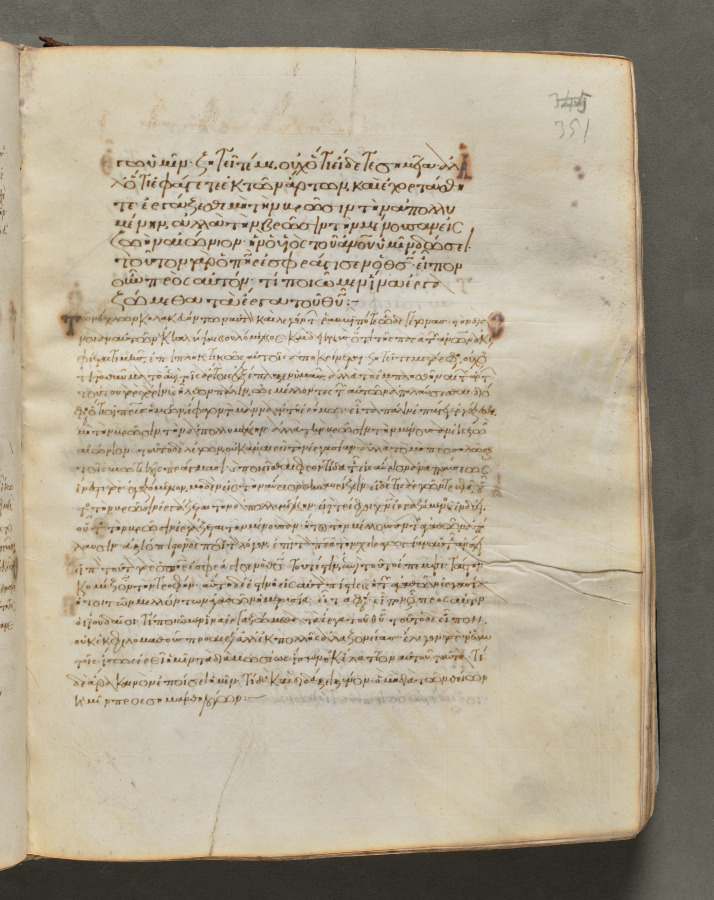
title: Text, folio 351 (recto), from a Gospel Book with Commentaries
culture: Byzantium, Constantinople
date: c. 1000–1100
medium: ink, tempera, and gold on vellum; leather binding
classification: Bound Volume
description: Each of the four gospels in this book opens on a page with brilliantly illuminated borders depicting the author of the text as well as birds—principally peacocks, symbols of the immortality of the soul—and fountains, representing the fountain of life and the salvation of the soul. This volume consists of 428 leaves with texts in Greek. Its level of sophistication suggests that it was probably written and decorated in a monastery in Constantinople.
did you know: Gospel books were carried in procession through Byzantine churches.